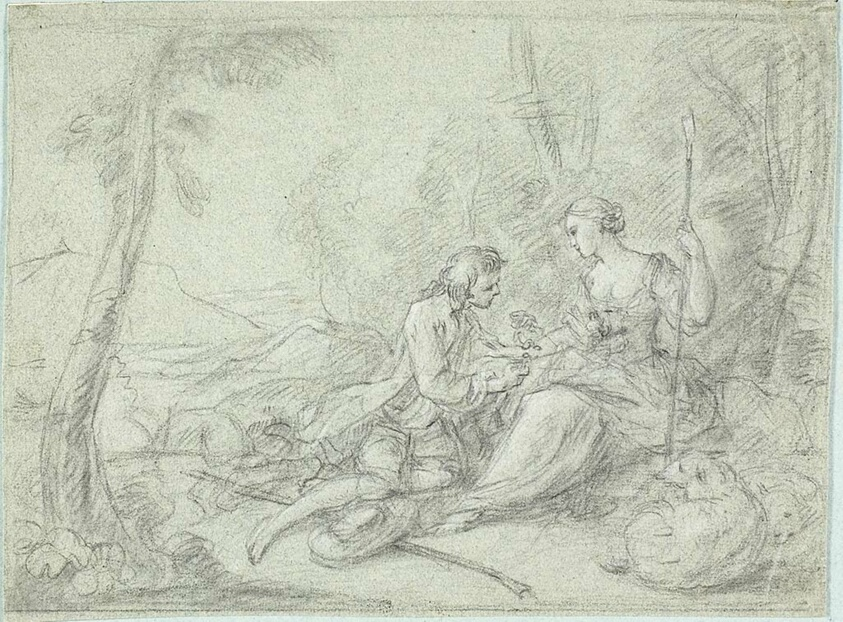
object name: Drawing and Watercolor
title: Shepherd and Shepherdess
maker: Attributed to Sébastien Le Clerc, the younger; French, 1676-1763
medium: Black chalk, heightened with white chalk, on blue laid paper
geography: France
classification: chalk; drawings (visual works); prints and drawing